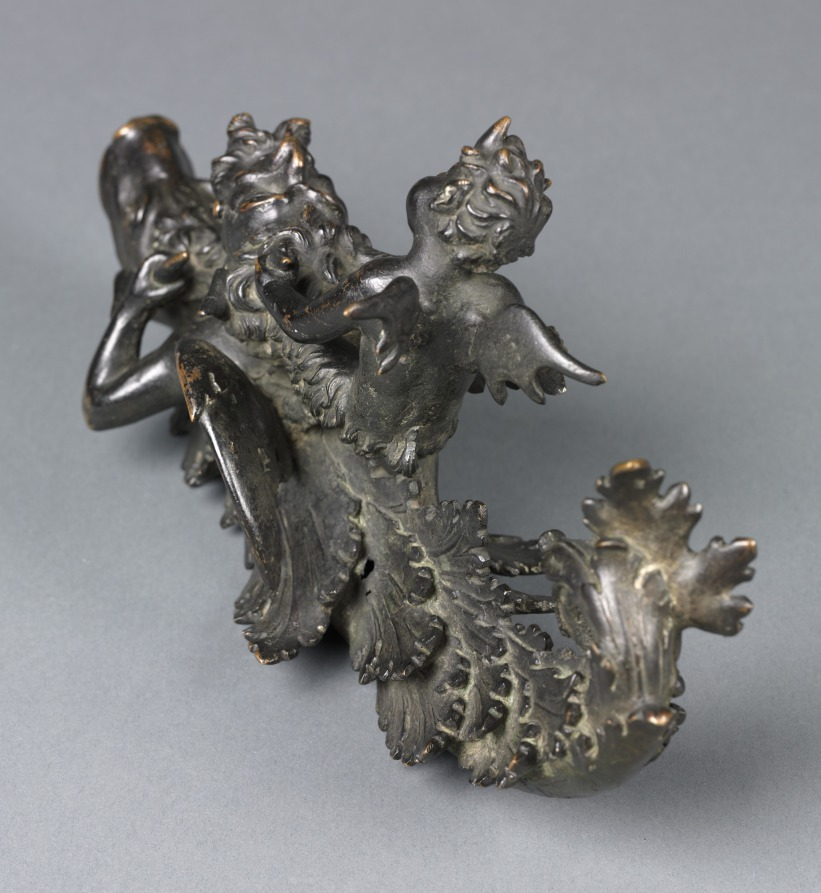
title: Doorknocker with Two Satyrs Riding an Ox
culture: probably Italy, Style of Padua, 16th Century, 19th century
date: 1800s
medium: bronze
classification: Sculpture